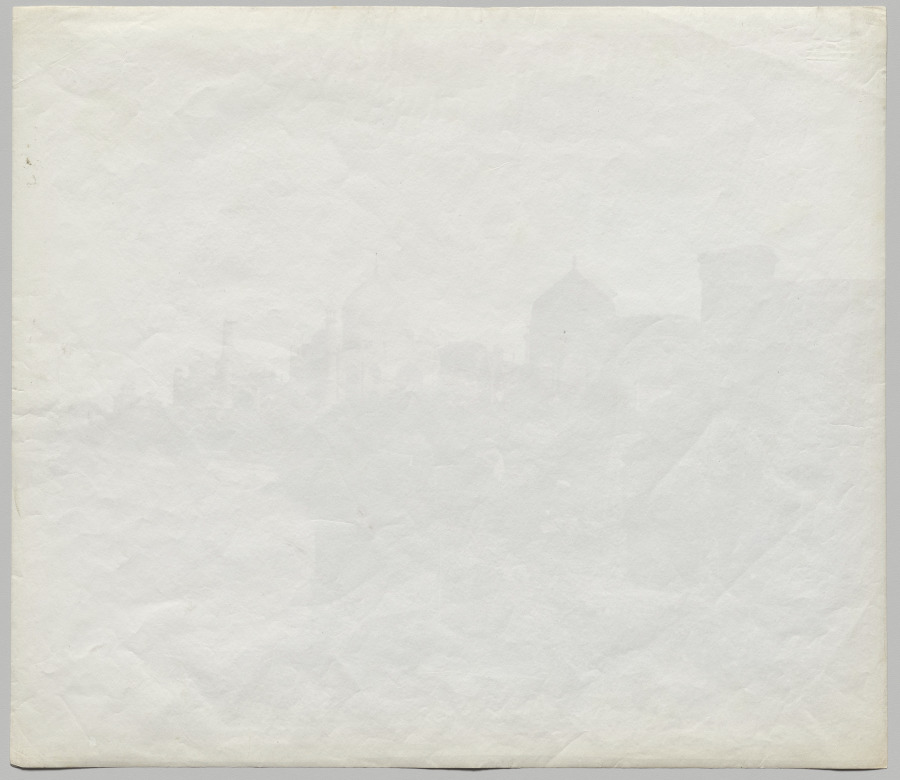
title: The Taj Mahal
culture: England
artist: Dr. John Murray (Scottish, 1809–1898)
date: c. 1858–62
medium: albumen print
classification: Photograph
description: This view of the Taj Mahal, shot from the bank of the Yamuna River, offers a dramatic contrast between the seemingly perfect white marble monument in the background and dark, ruined structures in the foreground. It sets the Taj into a broader geographic and cultural context by including nature (the river) and two cultures, one that has crumbled and another that, because it approaches aesthetic perfection, has been carefully preserved.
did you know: The Taj Mahal is a monument to lost love, built by Shah Jahan in 1632–53 to house the tomb of his favorite wife, Mumtaz Mahal.